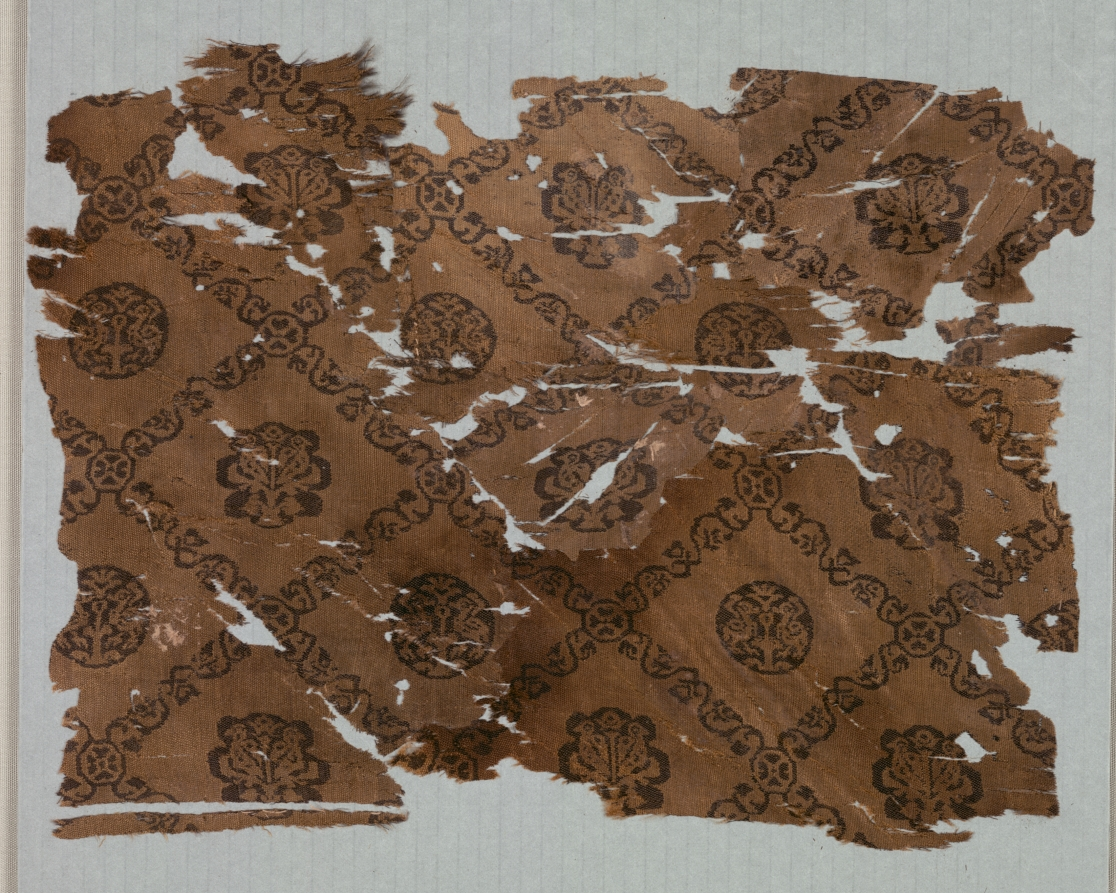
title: Silk with lattice of animals in medallions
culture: Egypt or Syria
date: 600s–800s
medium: Silk: samite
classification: Textile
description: In this fragile silk, vines bearing heart-shaped florets form a diamond grid that displays different motifs in alternate rows. Pairs of ducks with ribbons flying behind their necks flank a palmette tree, showing Iranian influence, and alternate with two birds in lobed medallions. The patterns in such expensive silks were copied in less costly wool tapestry weave by Coptic weavers in Egypt.